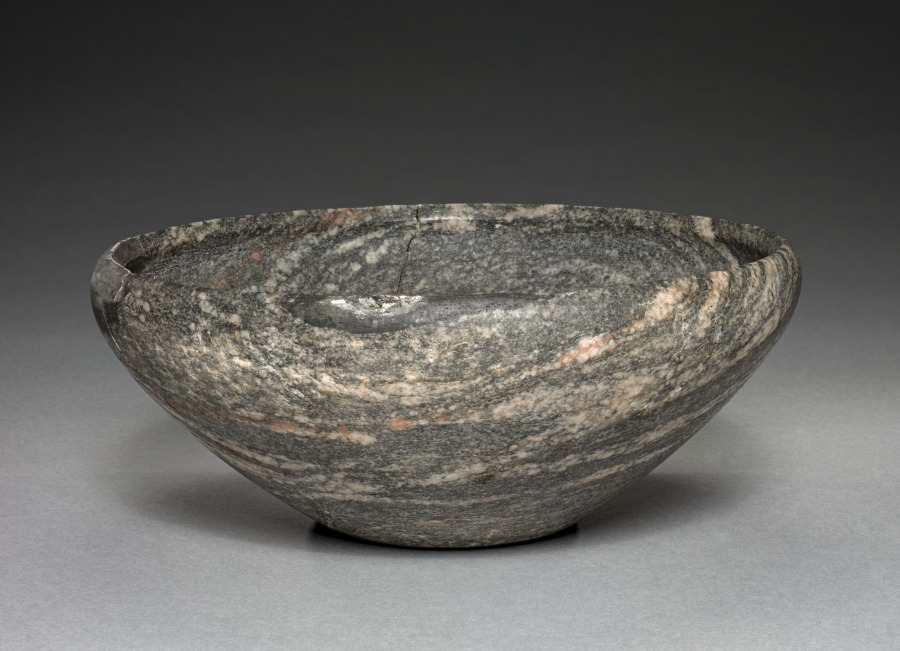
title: Bowl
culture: Egypt, Early Dynastic (2950–2647 BCE), Dynasty 2, reign of Nynetjer (c. 2700 BCE) or later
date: 2770–2647 BCE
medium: anorthosite gneiss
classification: Vessels